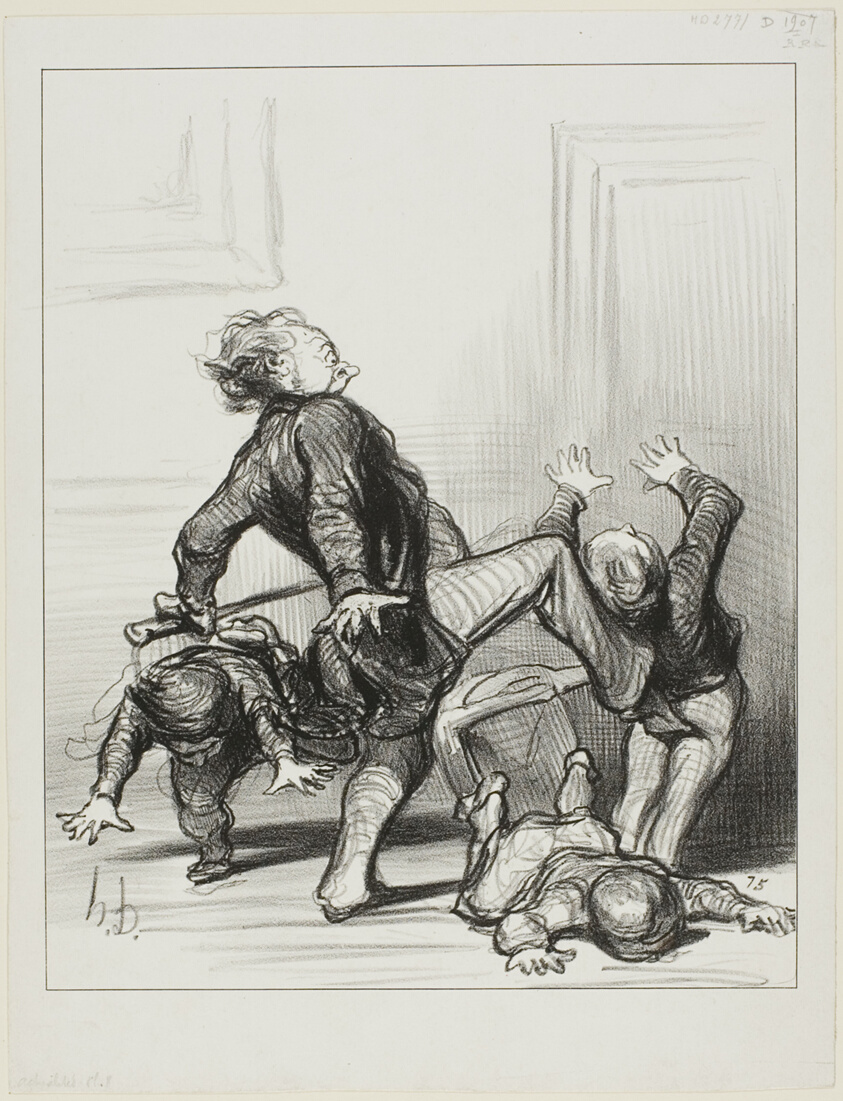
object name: Print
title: The Influence of the Peace Congress. “Oh you scoundrels, you are fighting again... you still don't know that man should live in peace and be master of himself,” plate 8 from Actualités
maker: Honoré Victorin Daumier; French, 1808-1879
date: 1849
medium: Lithograph in black on white wove paper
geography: France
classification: lithograph; print; prints and drawing